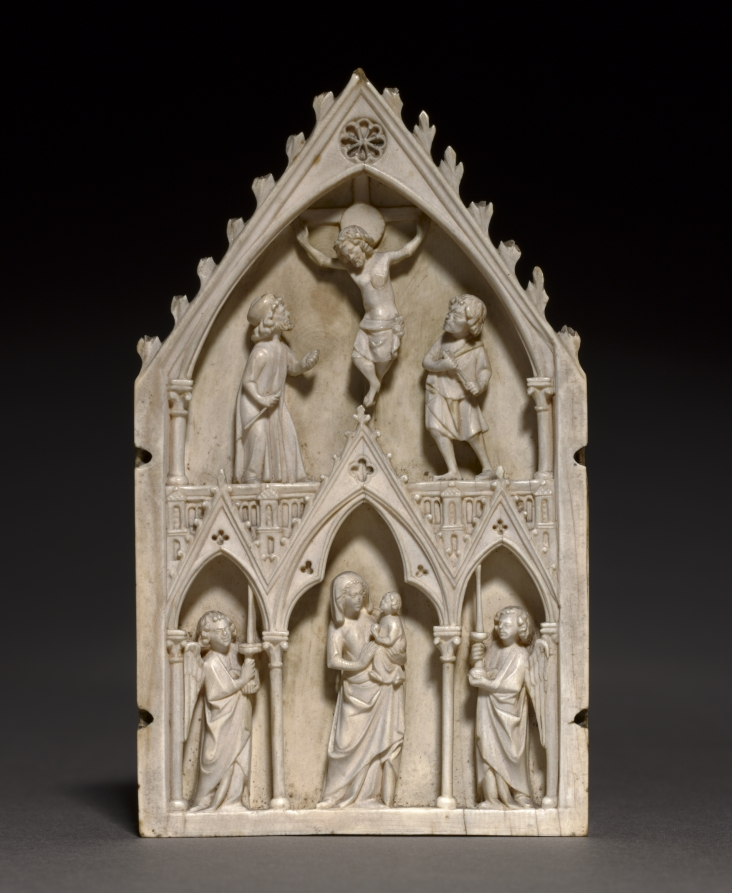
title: Plaque: The Crucifixion and Virgin and Child with Angels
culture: France, Paris?, Gothic period, 13th century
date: c. 1250–70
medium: ivory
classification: Ivory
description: This elegant panel once served as the center of an ivory triptych. Set into an intricate architectural frame that recalls Gothic forms, the figures are carved in three-quarter relief, suggesting free-standing sculptures placed in niches. Below, two standing angels bearing candles flank an elegant Virgin and Child. Above, the crucified Christ is shown tormented by the Roman soldiers Longinus and Stephaton, who flank him on either side.